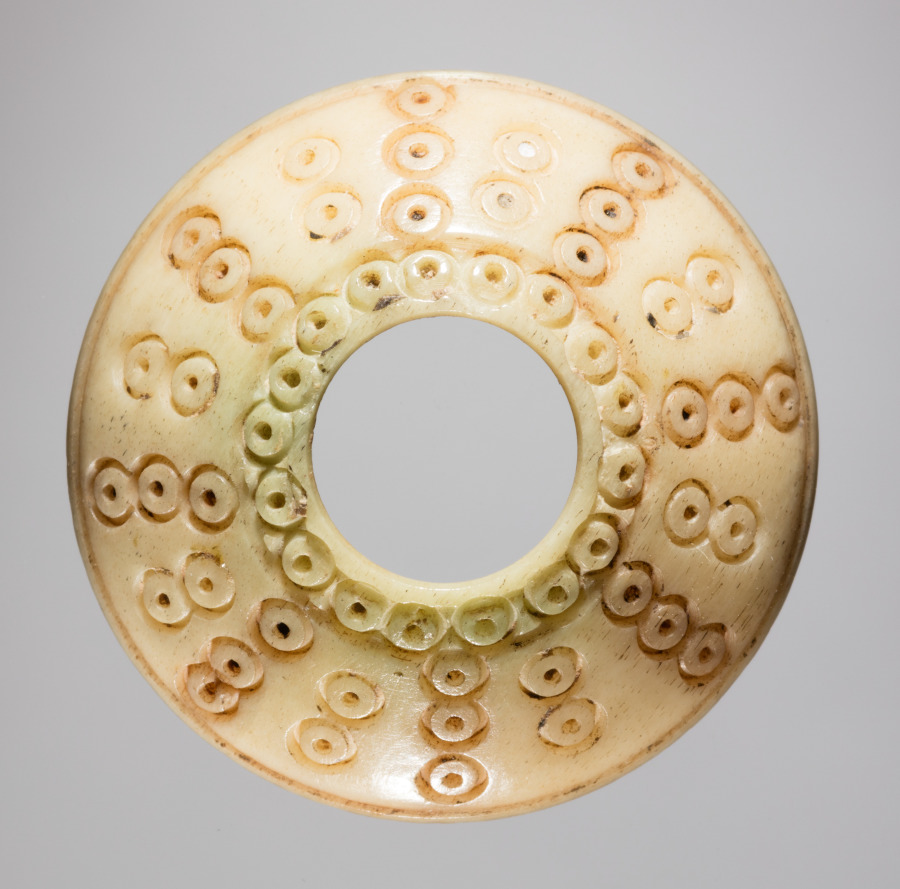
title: Spindle Whorl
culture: Iran, early Islamic period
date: 700s - 900s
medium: bone, incised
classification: Spindle Whorl